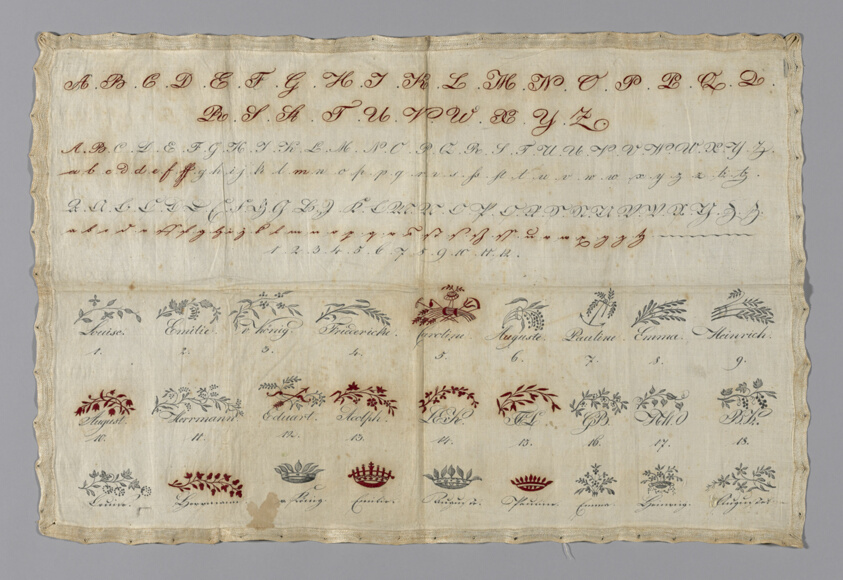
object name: Textile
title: Sampler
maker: Germany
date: 19th century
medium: Linen, plain weave; embroidered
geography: Germany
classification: textile; needlework (visual works); sampler